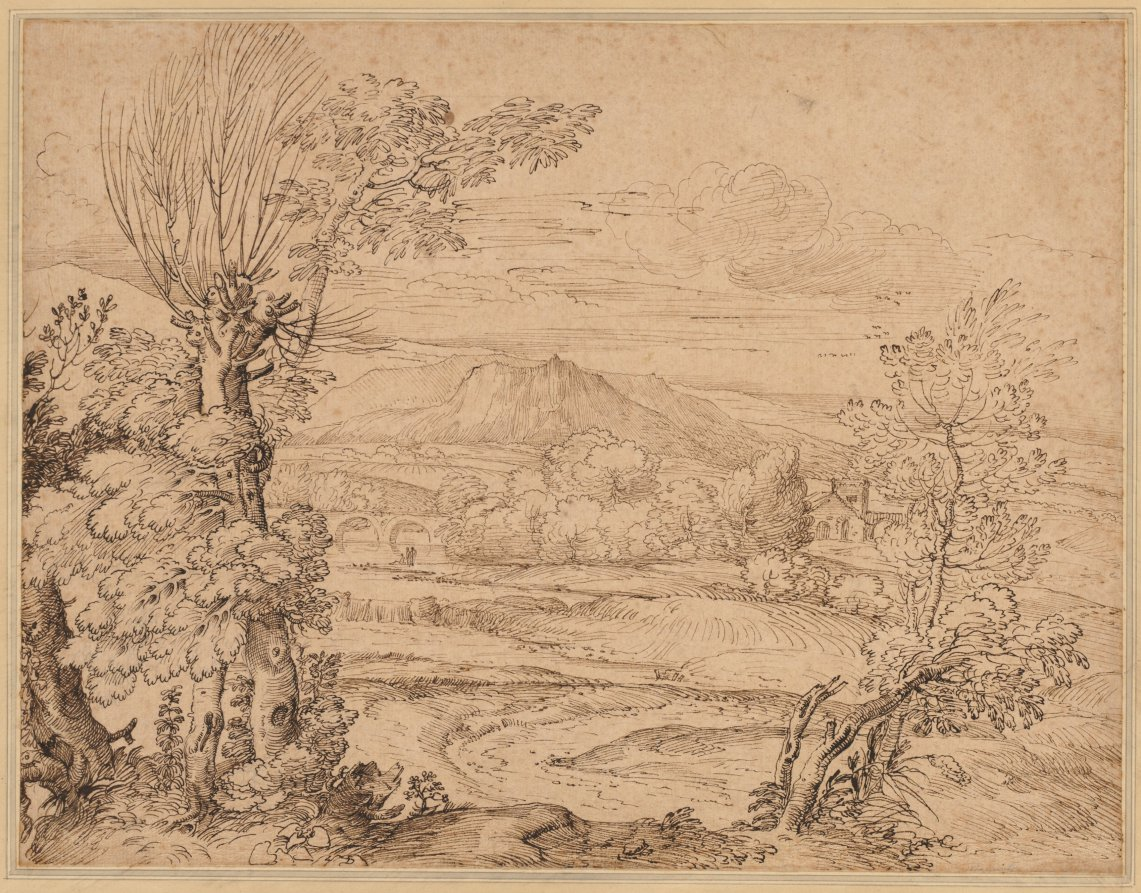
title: Landscape with a River and Aqueduct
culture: Italy, 17th century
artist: Giovanni Francesco Grimaldi (Italian, 1606–1680)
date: mid 1600s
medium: pen and brown ink over traces of black chalk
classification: Drawing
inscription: RECTO OF SECONDARY SUPPORT, lower center, in brown ink: V. Titian. / 1477-1526. ; lower left, in graphite: [44?] ; lower left, in red ink: 52 ; lower left and lower center, in graphite: 3/4 Gilt B & [illegible] - 2"x P f M[t?] [illegible] [illegible] - Wa[x?] ; lower center, in graphite: From the Colln. of Lord Brownlow. ; lower right, in graphite: X Titian. (Vecelli) [Vecelli is crossed out] Pieve 1477-1576. ; lower right, in graphite: [7x7?] [underlined, partially erased] / [illegible, partially erased] ; VERSO OF SECONDARY SUPPORT, lower left, in graphite: 383849 ; lower right, in graphite: [J?].567. [circled]